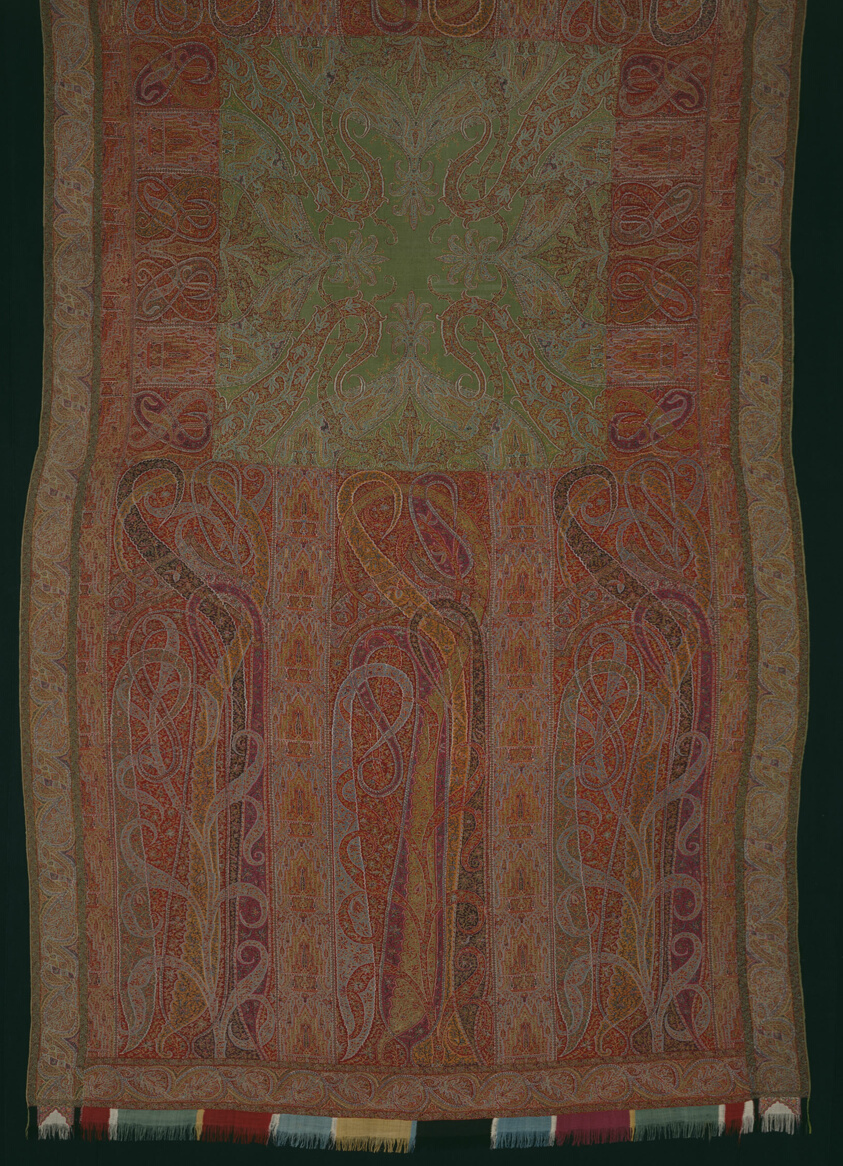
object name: Textile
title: Long Shawl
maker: India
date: 1840/45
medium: Wool, double interlocking 2:2 'S' twill tapestry weave, woven in rectangular sections; attached "Harlequin" tabs of pieced twill weaves; embroidered in darning, flat, and stem stitches; main warp fringe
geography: India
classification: textile; weaving